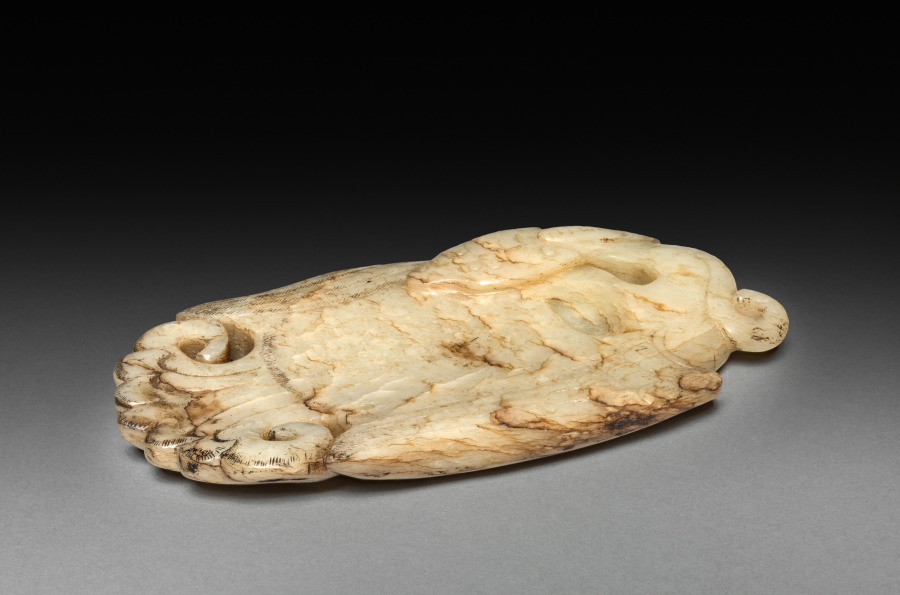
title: Bird Shaped Ink Stone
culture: China, Ming dynasty (1368-1644) ?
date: 1368–1644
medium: jade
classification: Jade